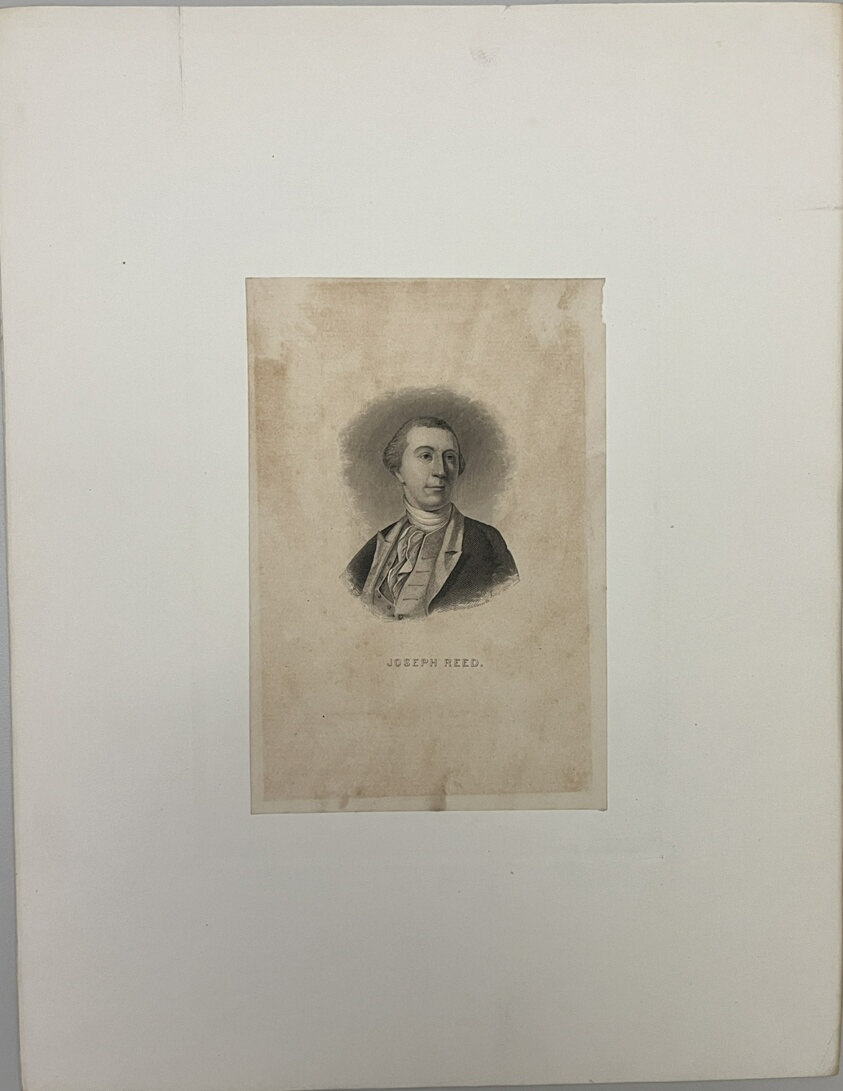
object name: Print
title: Joseph Reed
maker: De Lay Glover (American, 1832-1863)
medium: Etching on paper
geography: United States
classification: reproduction; print; prints and drawing